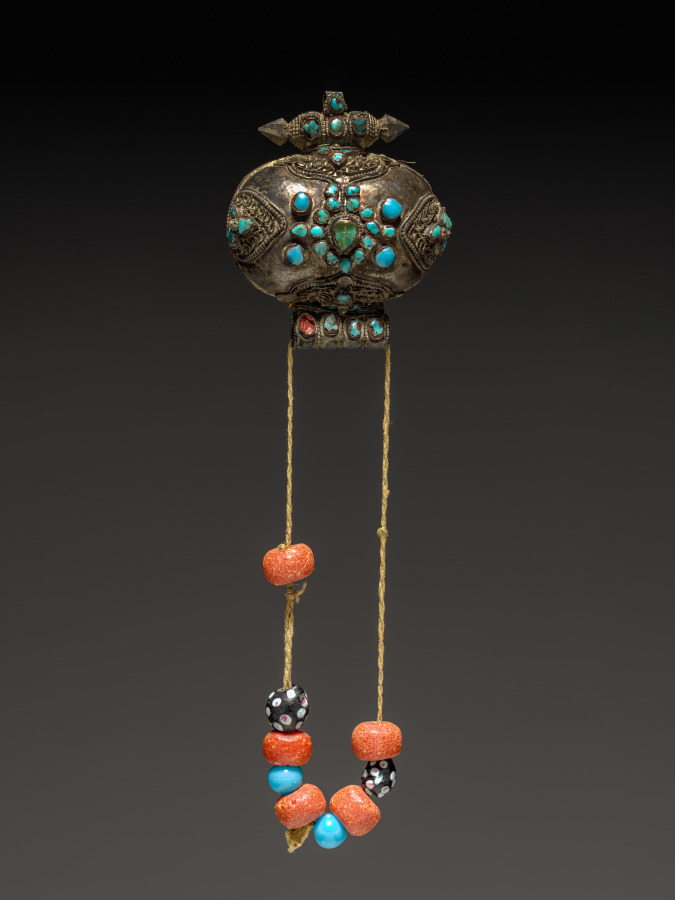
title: Amulet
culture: Tibet(?)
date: 1800s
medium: silver with turquoise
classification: Jewelry